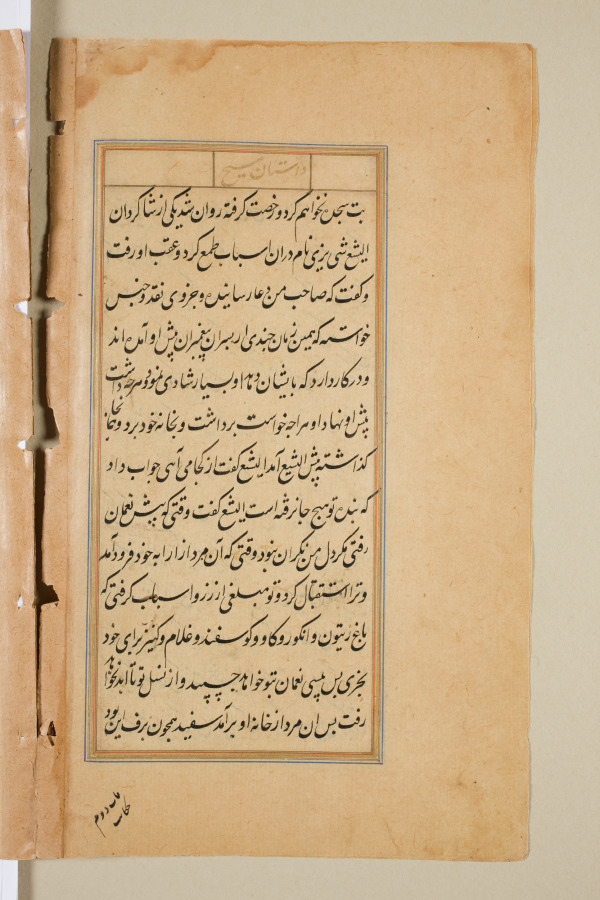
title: Text page from a Mirror of Holiness (Mir’at al-quds) of Father Jerome Xavier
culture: Mughal India, Allahabad, made for Prince Salim (1569–1627)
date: 1602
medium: Ink and gold on paper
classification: Manuscript